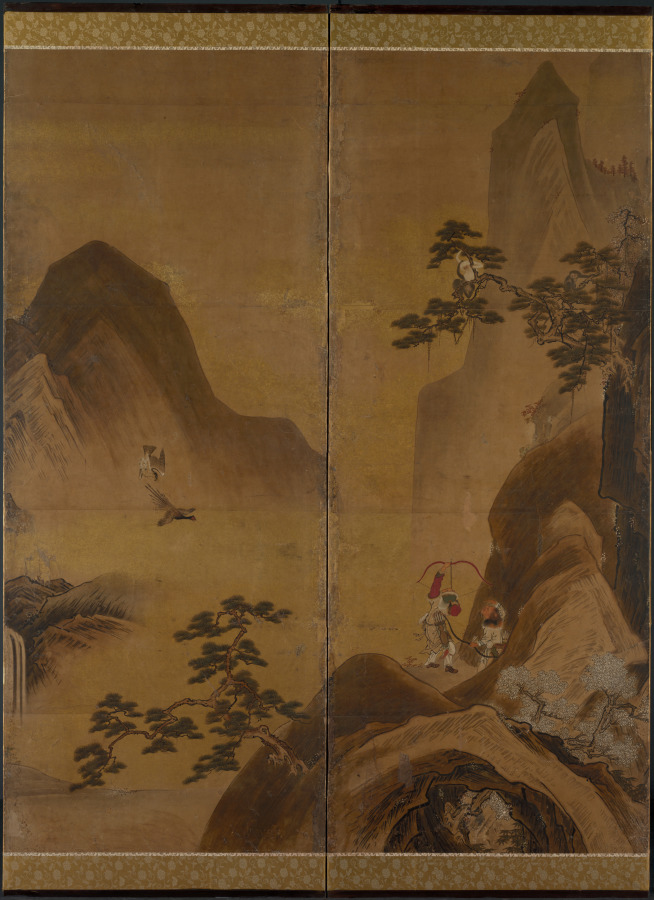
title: Tartars Hunting in a Mountain Landscape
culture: Japan, Edo period (1615–1868)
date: first half of 1600s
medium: six-panel folding screen; ink, color, and gold on paper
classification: Painting